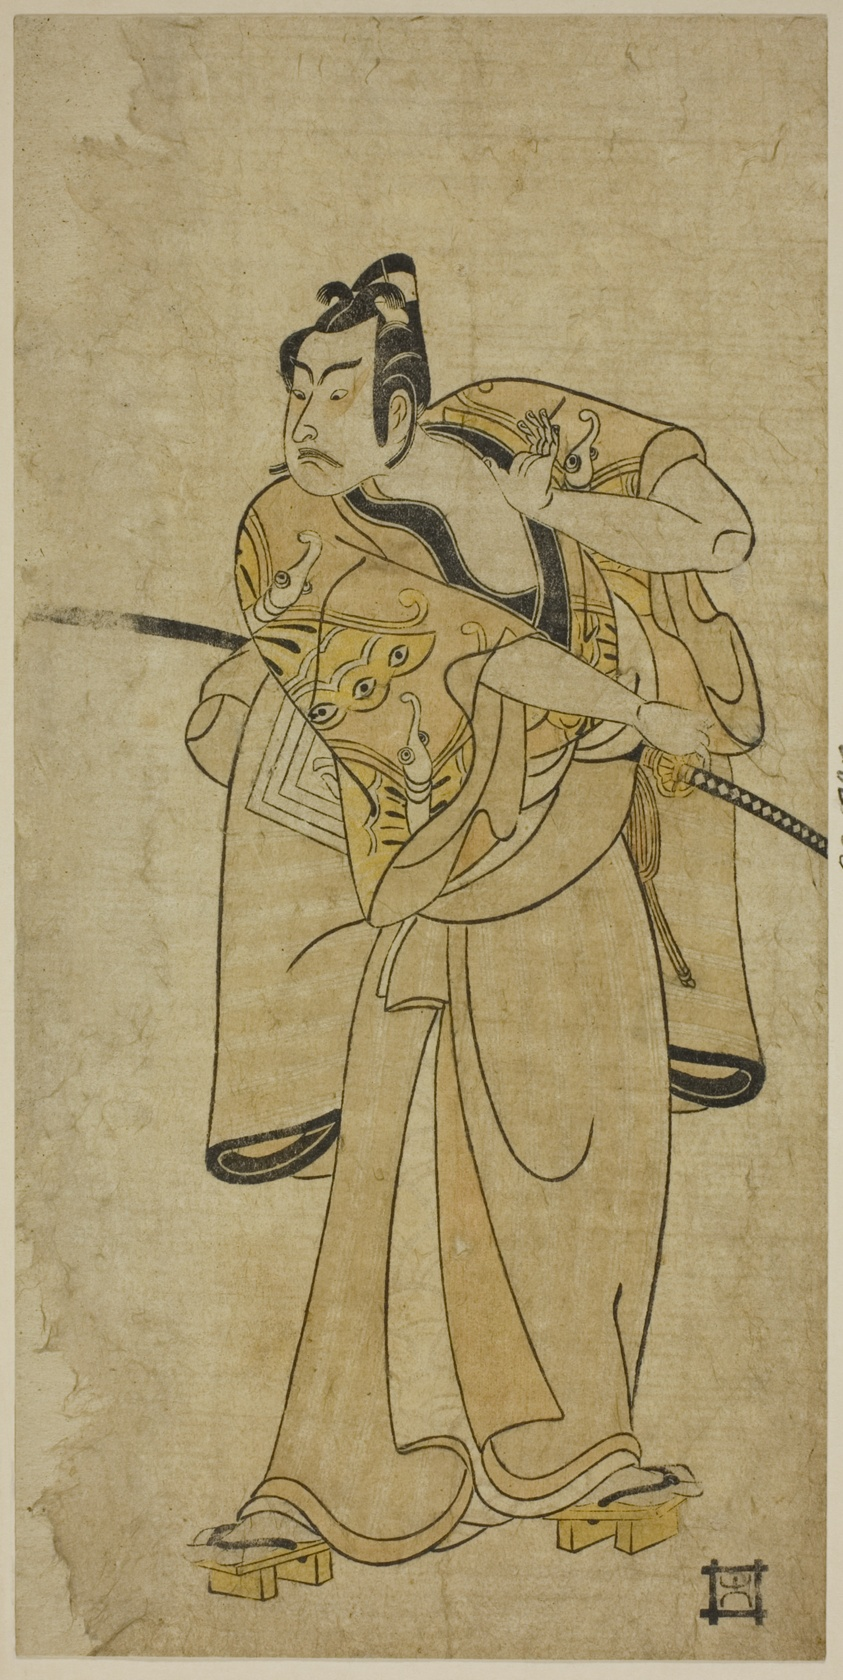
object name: Print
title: The Actor Ichikawa Yaozo II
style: Japanese (culture or style)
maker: Ippitsusai Buncho (Japanese, active c. 1755-90)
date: late 18th century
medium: Color woodblock print; hosoban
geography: Japan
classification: woodblock print; print; asian art